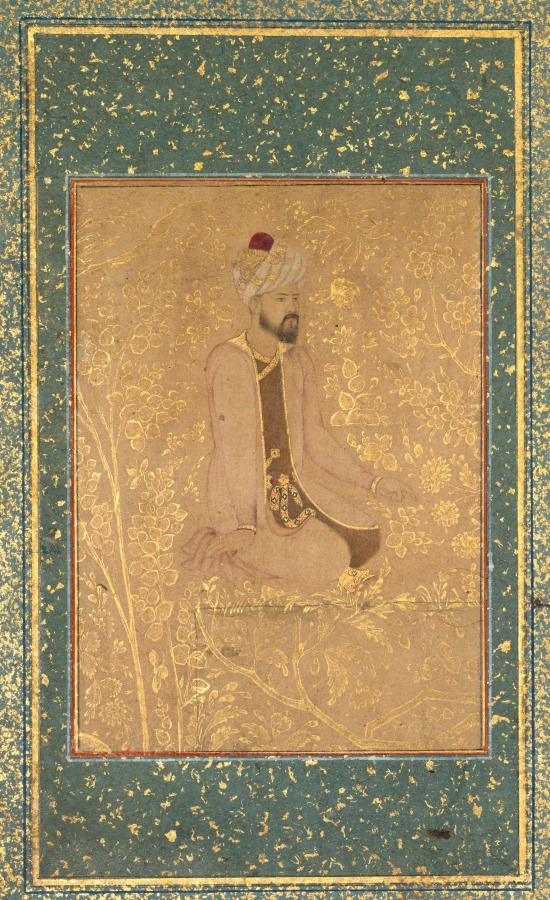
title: Seated Scholar, Border Fragment from the Teheran/Berlin album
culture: India, Mughal Dynasty (1526-1756)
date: c. 1605–1610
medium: color on paper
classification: Painting